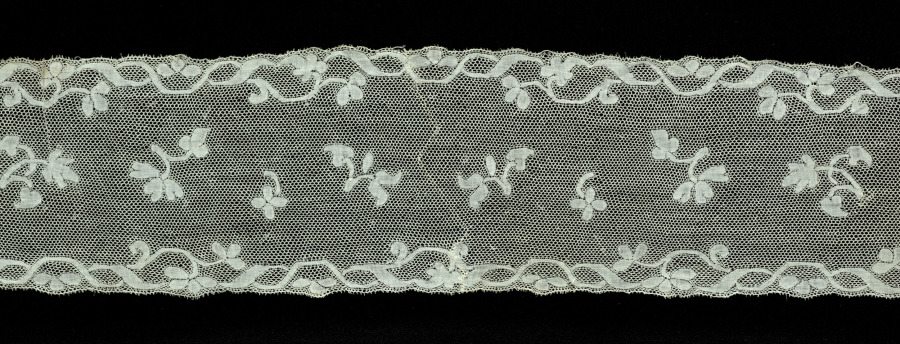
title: Lace Lappet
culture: France, Valenciennes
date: 1700s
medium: Linen: bobbin Lace (Valenciennes)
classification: Lace